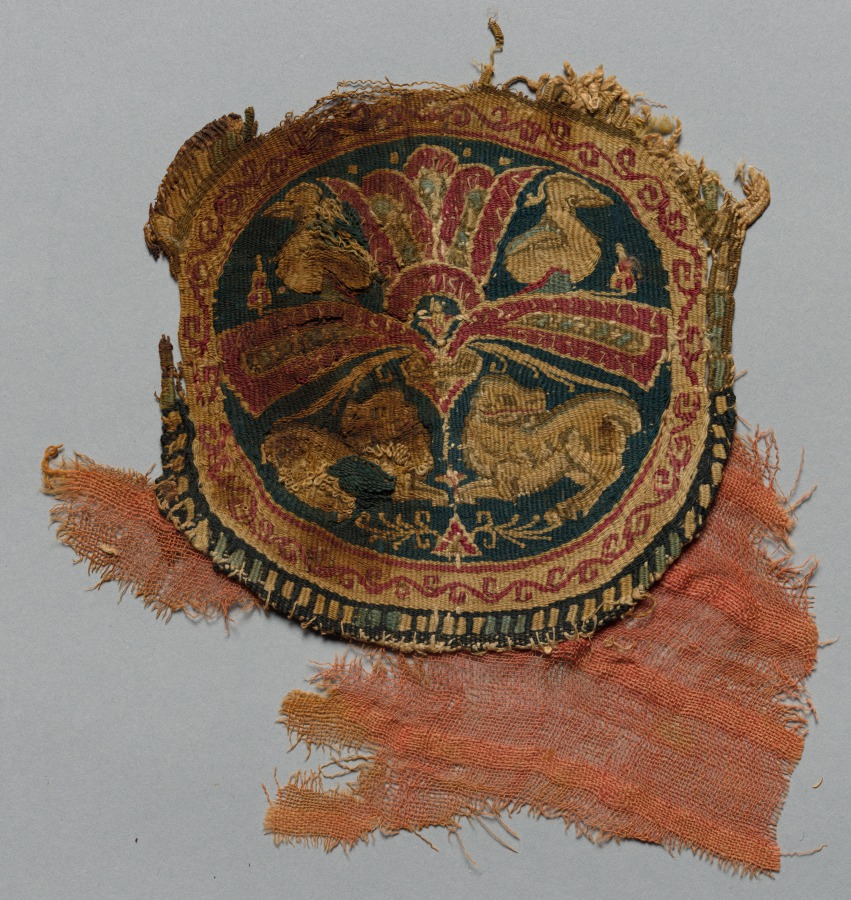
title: Fragment of a Segmentum with Palmette Tree, Lions and Birds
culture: Egypt, Islamic period, 8th - 9th century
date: 700s - 800s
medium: tapestry applied to tabby cloth; linen and wool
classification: Textile